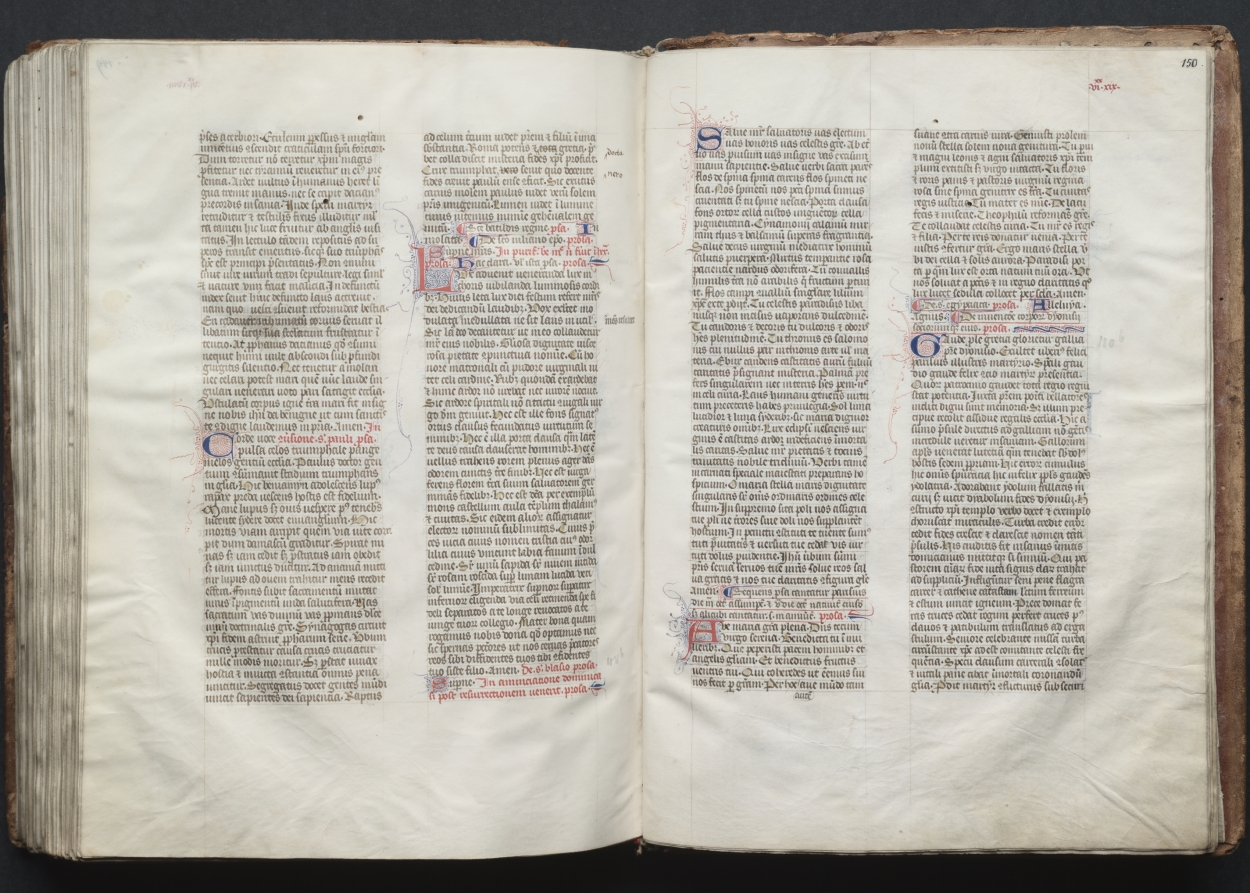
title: The Gotha Missal: Fol. 149v, Text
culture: France, Paris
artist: Master of the Boqueteaux (French)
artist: and Workshop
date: c. 1375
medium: ink, tempera, and gold on vellum; blind-tooled leather binding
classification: Bound Volume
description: The style and quality of this manuscript's decoration is typical of deluxe Parisian books made for aristocratic or royal patrons. Most of the book's decoration appears to be the work of the Master of the Boqueteaux, an artist active at the court of King Charles V (died 1380). His style was apparently shared by a number of book illuminators working in and around Paris. It is very possible that the Gotha Missal belonged to Charles V, but is not provable because the manuscript has no royal portraits and lacks a colophon. Given the book's magnificent decoration, however, it would seem that it was produced for a Valois prince, if not for the king himself. The manuscript receives its name from the German dukes of Gotha, its later owners.